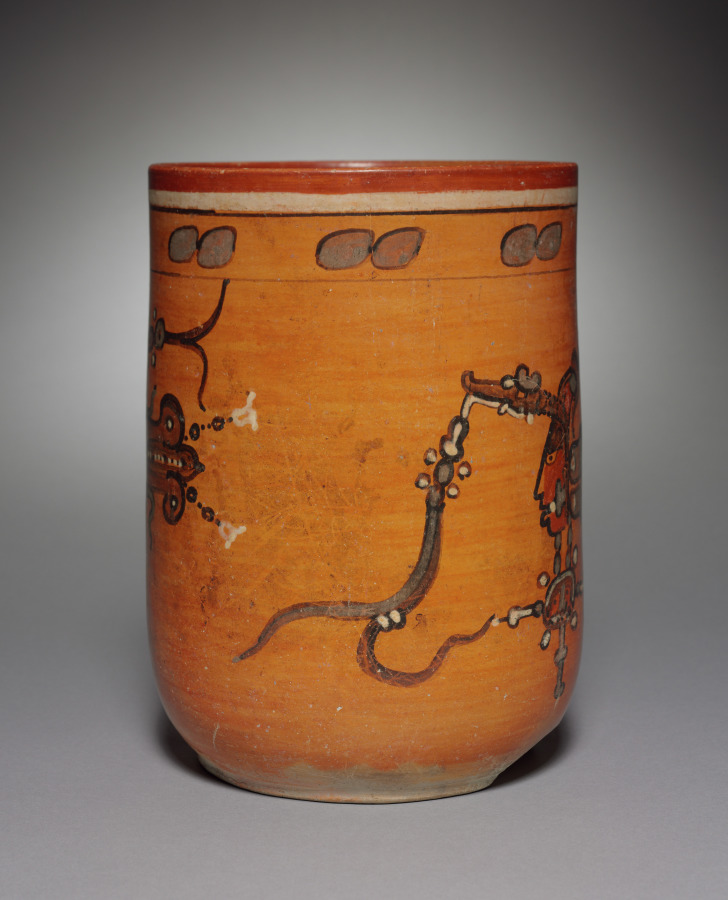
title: Vase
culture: Mexico, Maya, Campeche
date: 250–900 CE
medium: earthenware with colored slips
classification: Ceramic